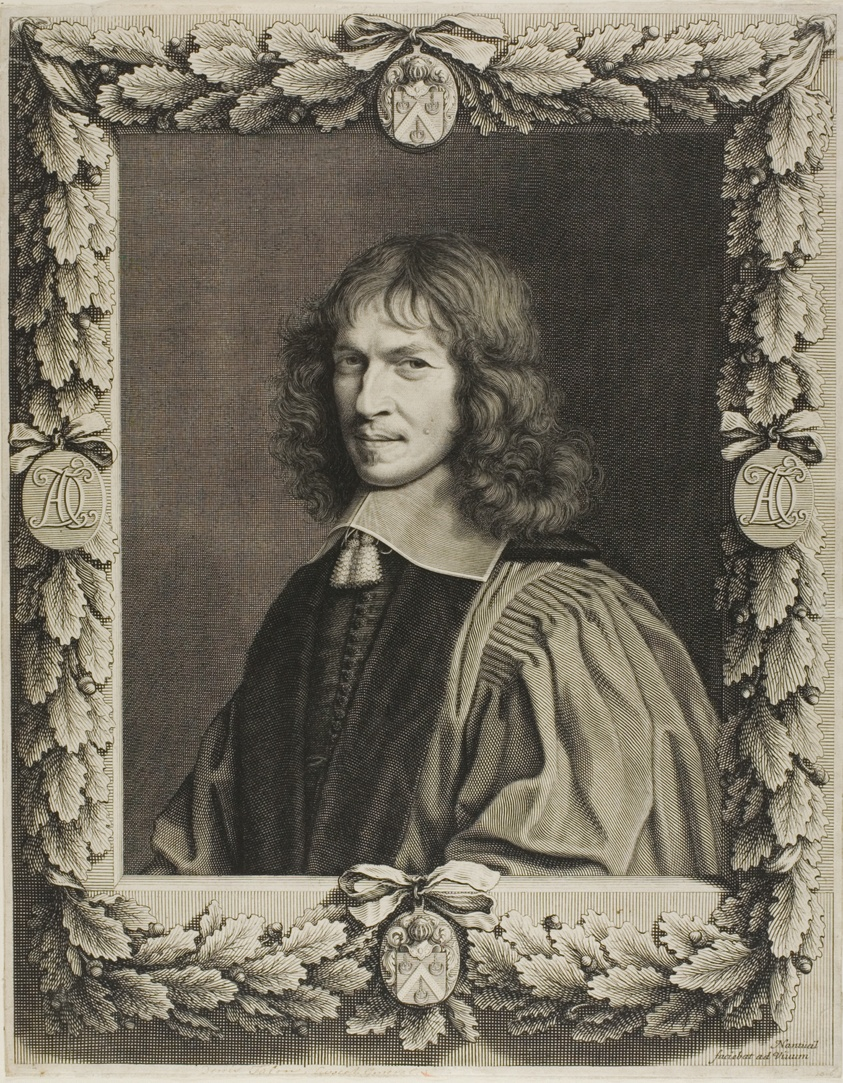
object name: Print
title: Denis Talon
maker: Robert Nanteuil (French, 1623-1678)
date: 1656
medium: Engraving on paper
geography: France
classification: engraving; print; prints and drawing